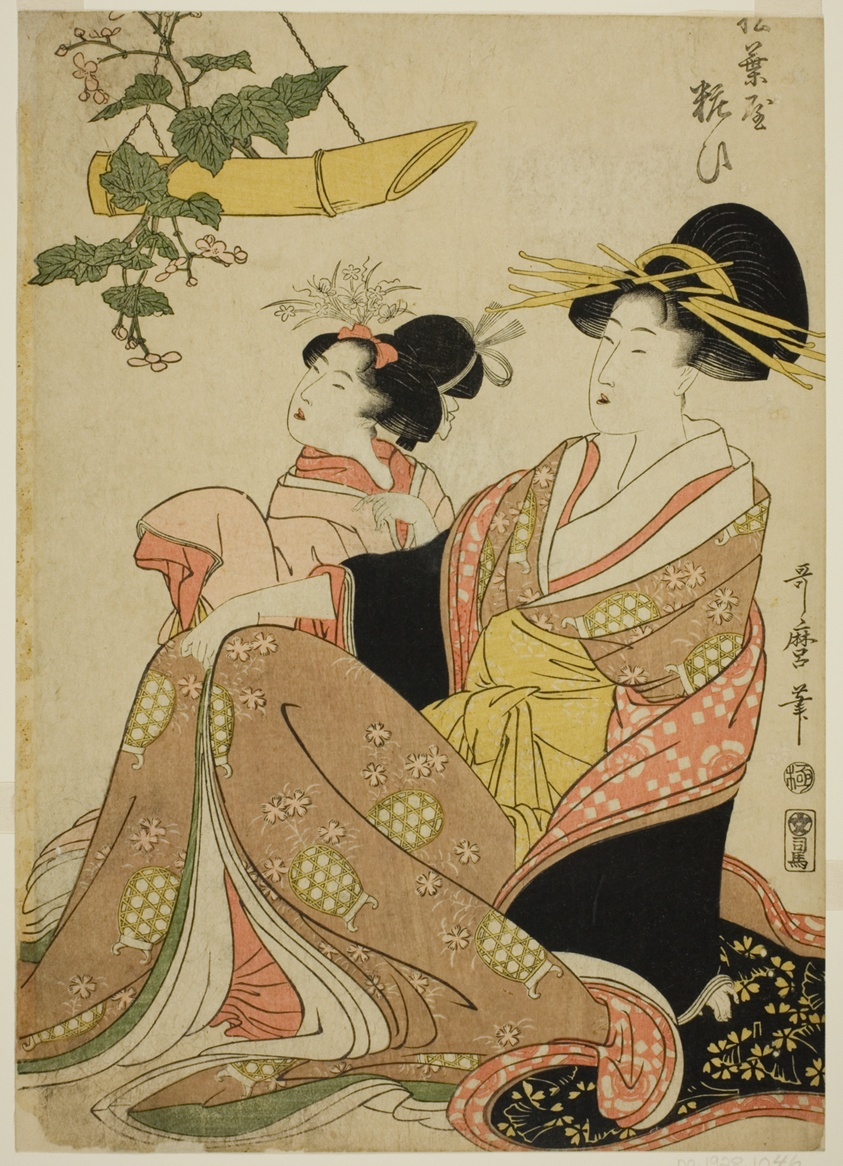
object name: Print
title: The Courtesan Yoso-oi of the Pine Needle House in the Yoshiwara and Her Attendant (Matsubaya Yoso-oi)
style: Japanese (culture or style)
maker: Kitagawa Utamaro 喜多川 歌麿 (Japanese, 1753 (?)-1806)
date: c.1802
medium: Color woodblock print; oban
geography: Japan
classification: woodblock print; print; asian art